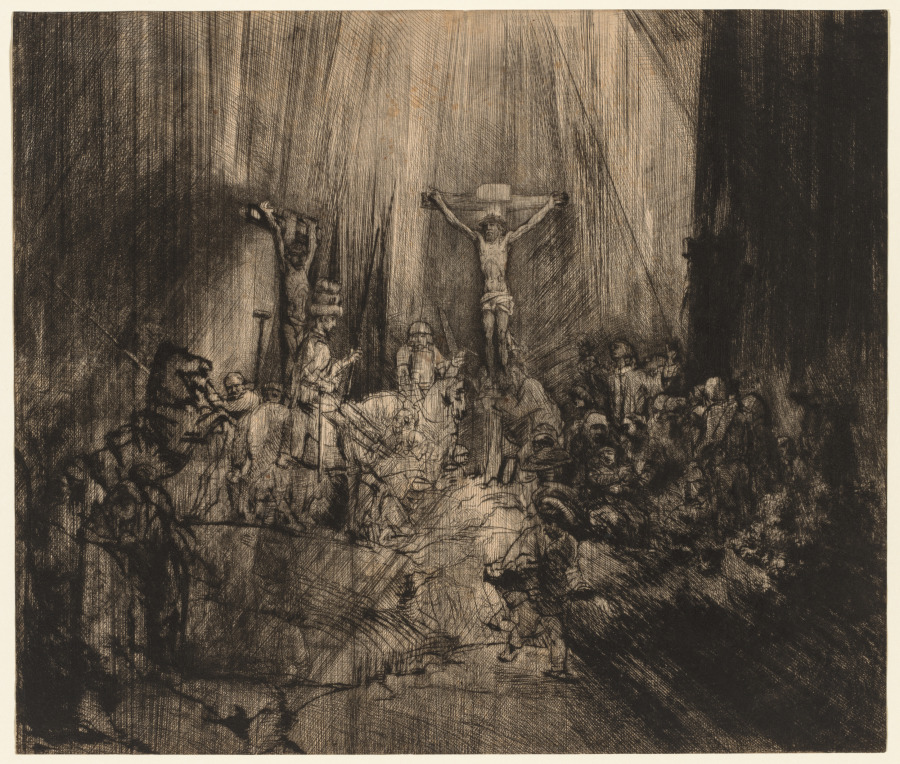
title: Christ Crucified Between the Two Thieves: 'The Three Crosses'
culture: Rembrandt, 17th century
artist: Rembrandt van Rijn (Dutch, 1606–1669)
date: 1653-c.1660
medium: drypoint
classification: Print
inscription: VERSO, lower left, in graphite: 301 C ; lower left, in graphite: 21805 ; lower left, in graphite: [?]35 ; lower left, in pen and brown ink: #[turned 45% with dots top, bottom, and at the two sides] ://:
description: Rembrandt’s Christ Crucified Between the Two Thieves is executed entirely in drypoint. Because of the delicacy of the technique, the copper plate was worn after the artist printed about 40 impressions of the first three states. In order to continue using the plate, Rembrandt reworked it, changing the image somewhat. In this fourth state, slashing strokes obscure the spectators visible in the earlier version, creating a tenebrous setting that focuses attention on Christ bathed in celestial light. Although drypoint is an inherently linear medium, Rembrandt used it to obtain tonal qualities associated with painting. The blackness becomes an active force that threatens to extinguish the light of Christ—a literal illustration of the Evangelist Luke’s description of the event that brought "a darkness over all the earth."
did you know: When he printed this impression, Rembrandt deliberately left ink on the printing plate, specifically on the left and right sides, essentially creating a unique work.